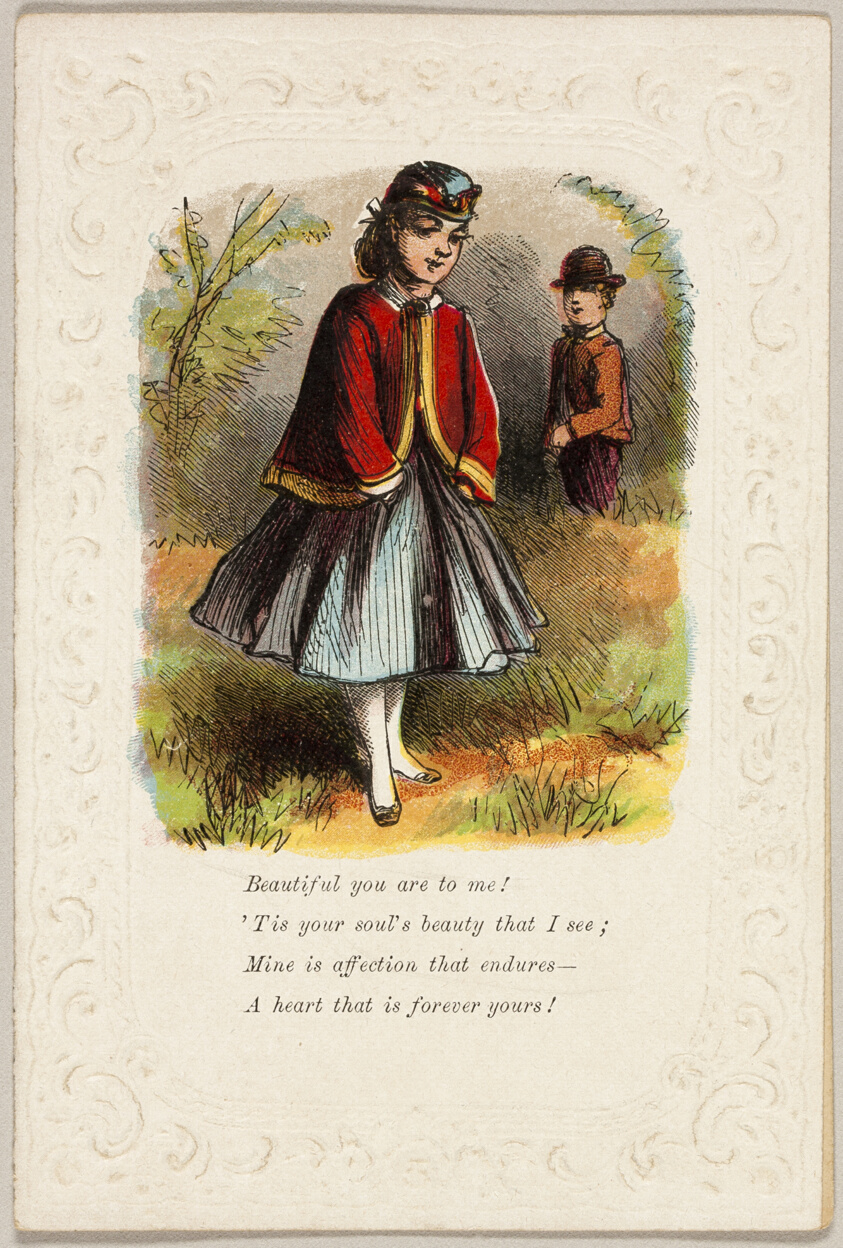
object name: Print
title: Beautiful You Are to Me (Valentine)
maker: Unknown Artist; American, 19th century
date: 1860/69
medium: Lithograph with hand-coloring on embossed ivory wove paper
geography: United States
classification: valentine; prints and drawing; print